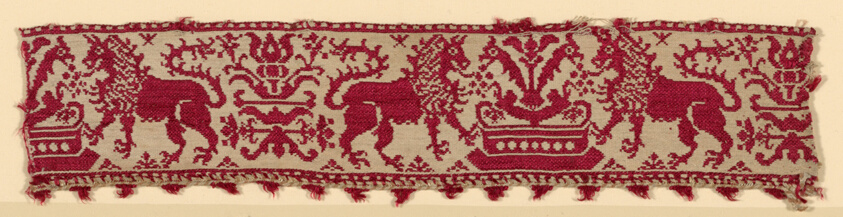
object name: Textile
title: Fragment (Border)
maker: Italy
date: 1601/25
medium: Linen and silk, plain weave, tied double cloth; edging linen and silk, warp-twining with ground weft fringe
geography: Italy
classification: textile; weaving